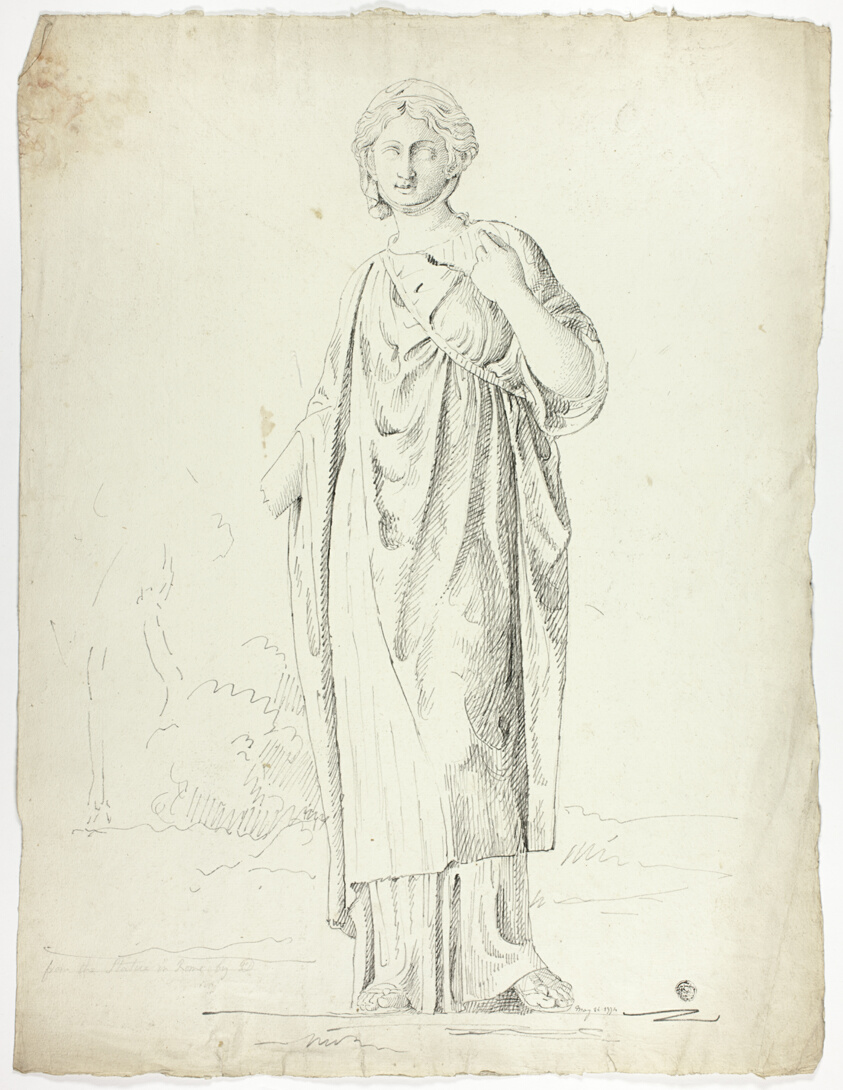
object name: Drawing and Watercolor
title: Antique Statue of Standing Draped Woman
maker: John Downman (English, 1750-1824)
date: 1774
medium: Pen and black ink with traces of graphite on ivory laid paper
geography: England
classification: pen and ink drawings; drawings (visual works); prints and drawing